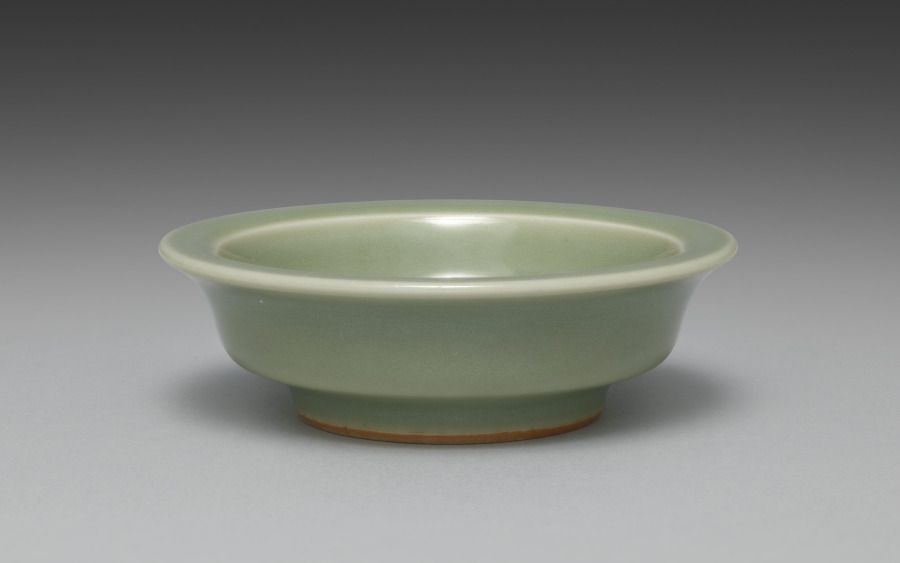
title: Saucer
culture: Japan, Meiji period (1868–1912)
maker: Seifū Yohei III (Japanese, 1851–1914)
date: 1893–1914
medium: One from a set of ten dishes; porcelain with green glaze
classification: Ceramic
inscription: 清風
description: Yohei III’s main output for his sophisticated clientele was in the form of tea sets and dining sets. He created a range of dishes in green glazes. He often produced in pairs, sets of five, or sets of ten. For this set of ten small dishes in a simple, round form that emphasizes the glaze above all, the box lid designates the piece as seiji, or green-glazed porcelain, using a general term for the extensive palette of green glazes often called celadon in English. The box lid further identifies the dishes themselves as tōchō, literally “bean-sized saucers,” a size that makes them suitable for dipping sauces.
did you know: The ten dishes in this set are stored in stacks of five in a two-compartment box.